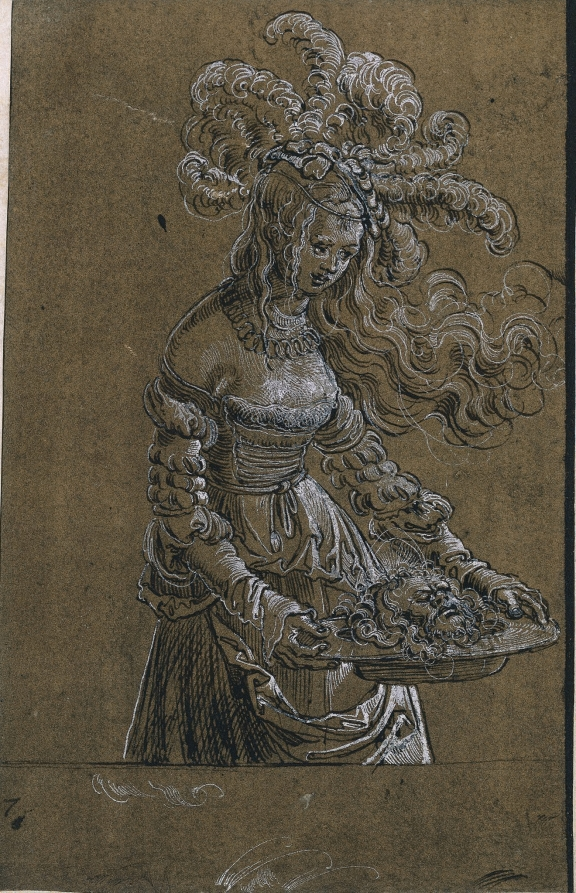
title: Salome with the Head of St. John the Baptist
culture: Germany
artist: Albrecht Altdorfer (German, c. 1480–1538)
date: c. 1517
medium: pen and brown ink and brush and brown wash and white gouache; framing lines in pen and black ink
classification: Drawing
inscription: lower right, in brown ink: 17; on paper mounted to recto, lower right, in brown ink: 40; verso of secondary support, center, in graphite: Liechtenstein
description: Salome's story is described in the biblical Gospels of Mark and Matthew. After dancing for King Herod of Galilee, her new stepfather, she was granted any wish she desired. Influenced by her mother, Herodias, she asked that John the Baptist--who was then imprisoned for condemning Herod and Herodias' marriage--be executed. Here, Salome enacts the most gruesome part of the story, presenting the prophet's head on a platter. In the Renaissance, the story was believed to presage the sacrifice of Christ on the cross and the presentation of the Eucharist during Catholic liturgy. Altdorfer's drawing emphasizes Salome's pride--a dangerous sin--through her elaborate garments, billowing, plumed headdress, and flowing long hair. He articulated these details using black ink highlighted with white gouache on paper darkened with brown wash and a finely pointed pen.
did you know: The artist colored the paper on this drawing a dark brown in order to emphasize the highlights and shadows created with inks.